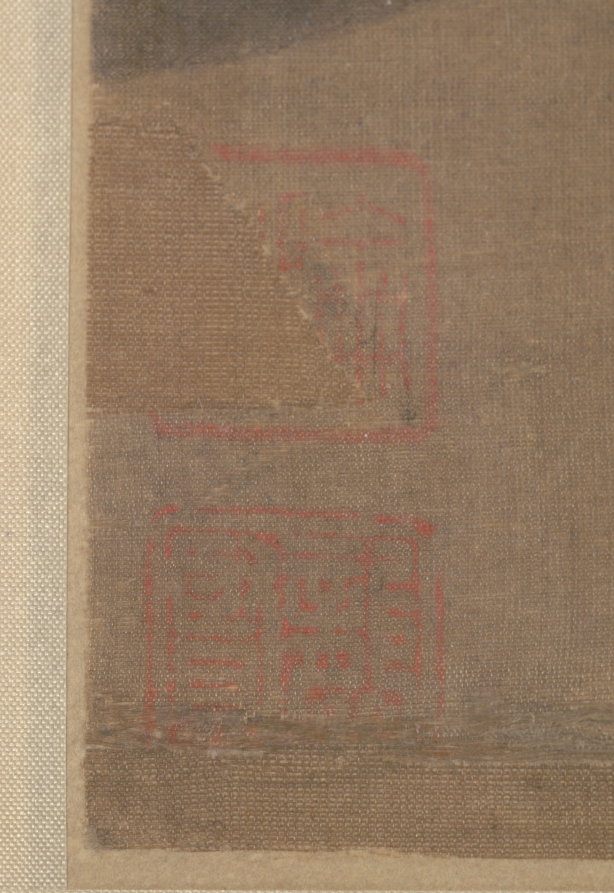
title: Landscape in the Style of Dong Yuan and Juran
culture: China, Qing dynasty (1644-1911)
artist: Gong Xian (Chinese, 1599–1689)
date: c. 1650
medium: hanging scroll, ink with white pigment on silk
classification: Painting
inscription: 畫家董巨，實開南宗。既無剛根之氣，復無刻畫之跡。後之作者或以才見，或以法稱。唯董巨則幾乎道矣。然逞才則離法，泥法則叛道。至道無可道。說者謂即歛才就法之謂道。問之董巨，而董巨不知，忽乎微矣。此幅余二十年前舊作。藏之新安吳氏。吳君晉明寶之若家珍。後携之金陵。命余題識。余因與晉明論畫及此，并紀之。非敢曰此效法董巨而有得焉者也。 庚戌冬杪半畝居人龔賢。 [印]龔半千; 野遺賢; [左下]龔賢; [上]可能另有龔賢一印。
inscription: 2 additional seals of Cheng Qi 程琦 (1911–1988)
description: Towering peaks and unfolding ranges are piled up and overlaid with layer after layer of brushwork to give an overall dense, dark, and even melancholic effect. Gong Xian created a personal style of landscape, which departed greatly from his models Dong Yuan and Juran. The tension between tradition and individuality had been a topic of interest for the Chinese artist. As Gong Xian writes in his inscription: "Painters of later periods may be known for their natural talents or praised for their observance of established traditions. . . . However, those who indulge in showing off their talent will deviate from the tradition, while those who adhere to tradition will alienate themselves from the Dao. The supreme Dao is inexplicable in words. . . ."